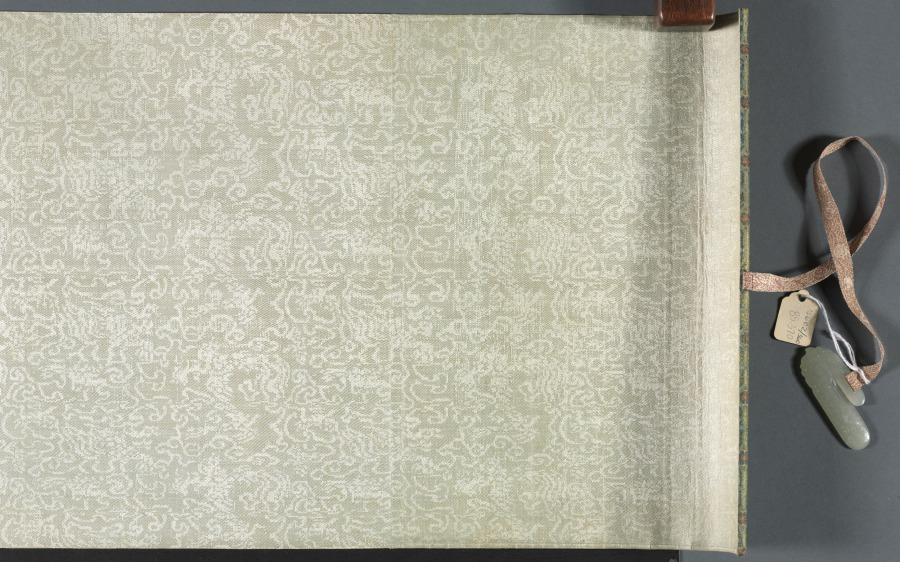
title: Water Village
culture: China, Ming dynasty (1368–1644)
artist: Wen Boren (Chinese, 1502–1575)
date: 1570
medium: handscroll; ink and light color on paper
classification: Painting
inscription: 隆慶庚午秋仿趙文敏筆. 五峰文伯仁 [印] 五峰山人; 文伯仁印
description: In the autumn of 1570, Wen Boren painted this seemingly unemotional scene of low-lying marshlands with a chain of rounded mountains in the background. A fishing boat is nestled on the shore near the village. Although paths and bridges traverse the landscape, only two people are visible in the stillness. From the restrained atmosphere of this landscape, one would never guess that Wen Boren was known as the “bad boy” of the Wu School for his explosive temper. As a younger man, he was even embroiled in a contentious lawsuit with his own uncle, Wen Zhengming (1470–1559), a master of Ming dynasty painting with whom he had trained. The ideal of the scholar-painter, or literati, was that an artist’s moral character is reflected in his paintings, so there was great incongruity between Wen Boren’s difficult personality and his restrained landscapes. A contemporary, Wang Shizhen, wrote this about him: "This gentleman is prone to behave odiously and screamed accusations at people. How is it possible for him to carry in his bosom such a wealth of scenic wonders?" Who knows what effort it took to subdue his fractious spirit to project an image of coolness and refined taste in his paintings?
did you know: A foreground tree has an eccentric twisting silhouette and pepper-dot "halo" of leaves.